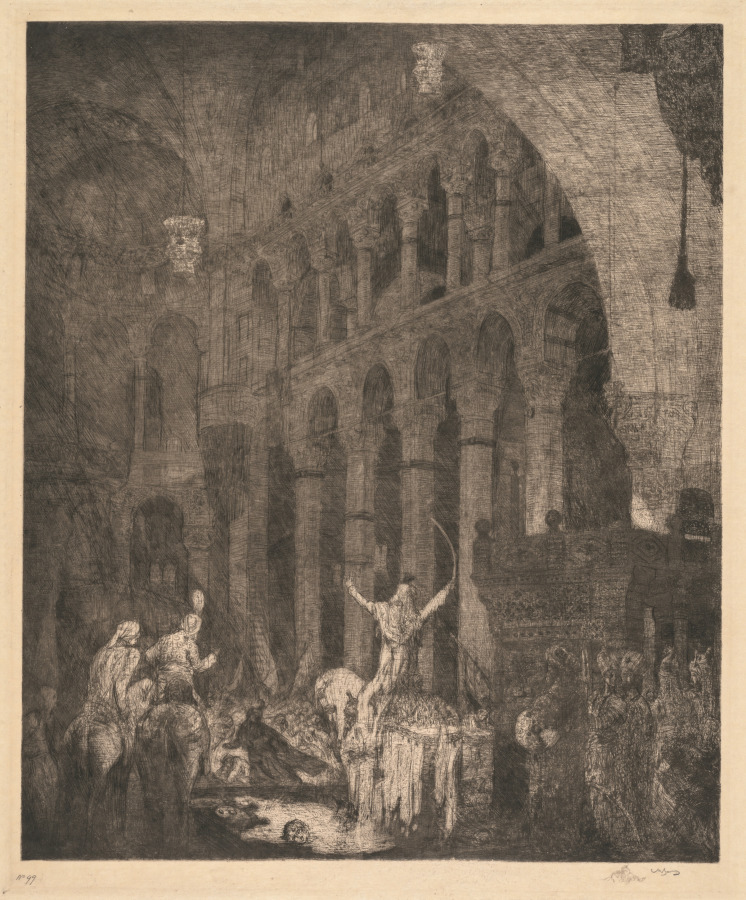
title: Mohammed II in the Aye Sophia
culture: Netherlands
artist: Marius Alexander Jacques Bauer (Dutch, 1867–1932)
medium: etching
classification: Print